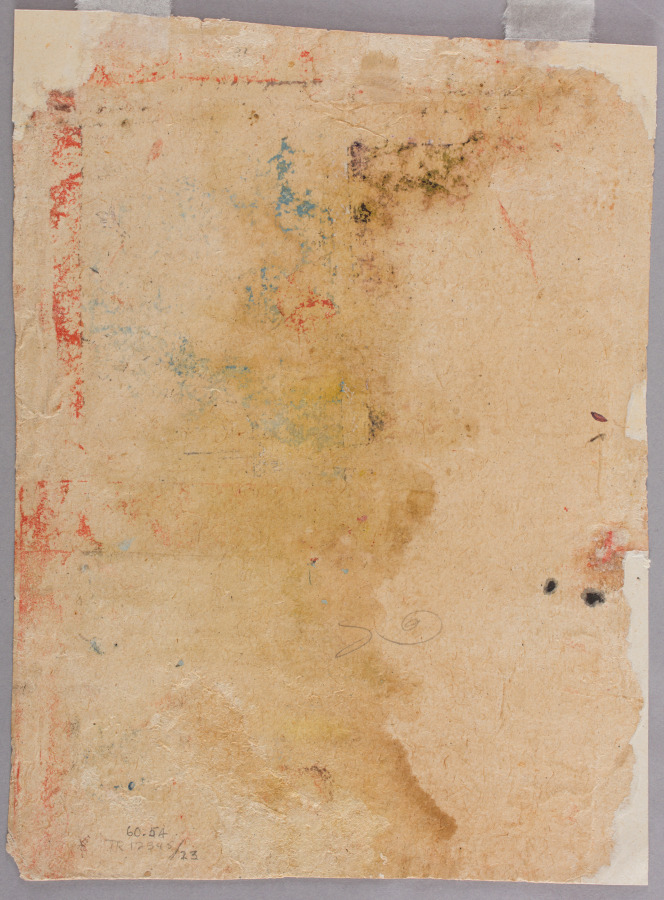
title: Lover's Tryst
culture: India, Rajasthan, Bundi Style, later half 18th century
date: 1750–1800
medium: Gum tempera and gold on paper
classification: Painting